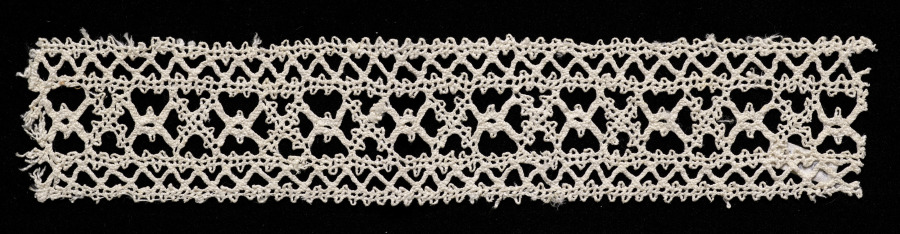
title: Lace Insertion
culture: Italy, Venice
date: 1540–60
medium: Bobbin lace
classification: Lace